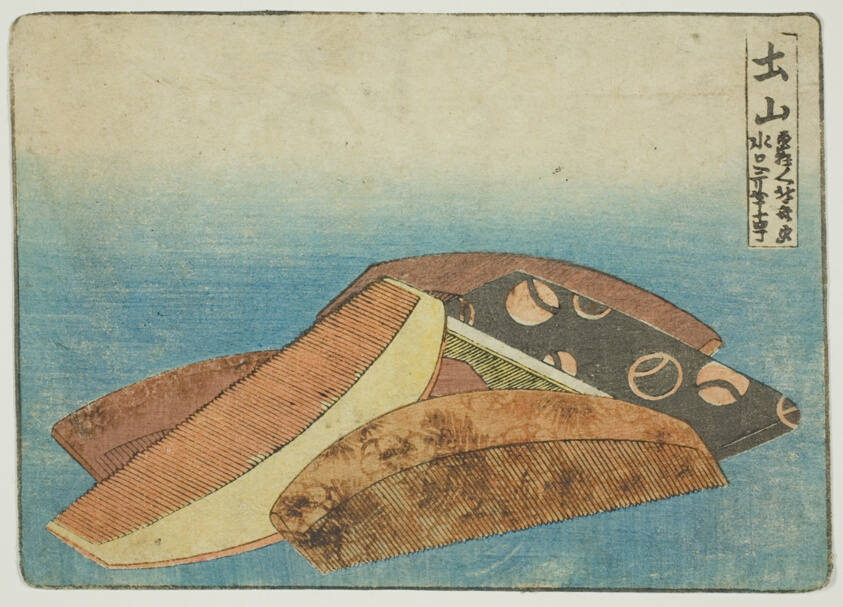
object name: Print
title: Comb Products in Tsuchiyama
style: Japanese (culture or style)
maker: Katsushika Hokusai 葛飾 北斎; Japanese, 1760-1849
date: c. 1804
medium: Color woodblock print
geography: Japan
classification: woodblock print; print; asian art